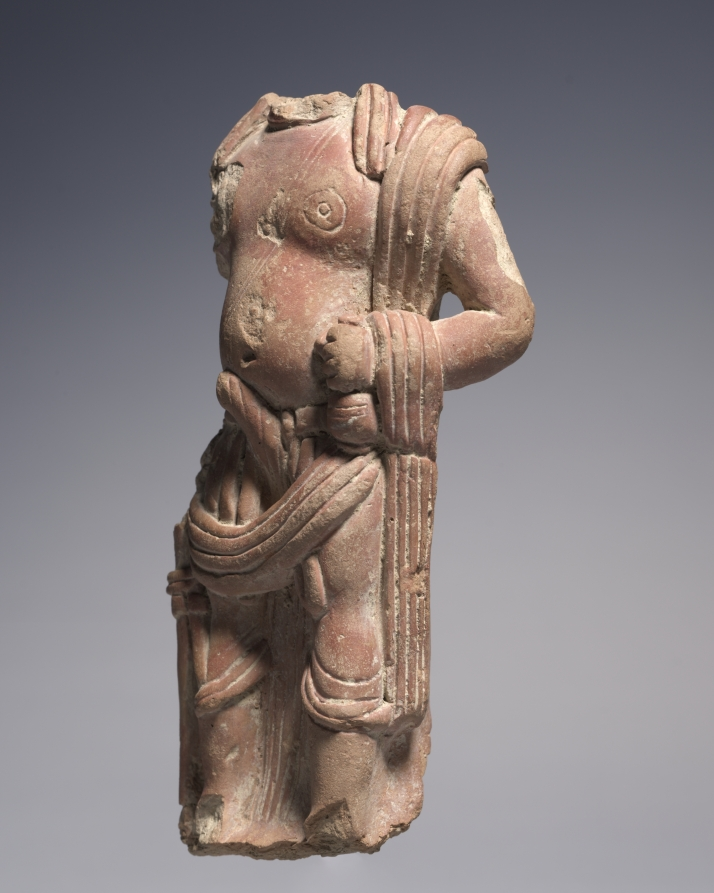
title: Male Fertility Divinity, Possibly Shiva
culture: Northern India, possibly Mathura, Kushan period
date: c. 120–200 CE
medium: terracotta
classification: Sculpture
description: This figure combines an unusual set of attributes. He has long dreadlocks over his shoulders, like an ascetic, and he holds a water pot, like a Brahmin or naga (serpent deity). Also, he seems to carry a sword and dagger like a warrior and is ithyphallic, indicating his virility and fecundity. He may best be identified as a local divinity worshipped for purposes of increasing fertility, but he could also be recognized as an early form of the Hindu god Shiva.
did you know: This sculpture was first made from a mold, then subsequently hand modeled.